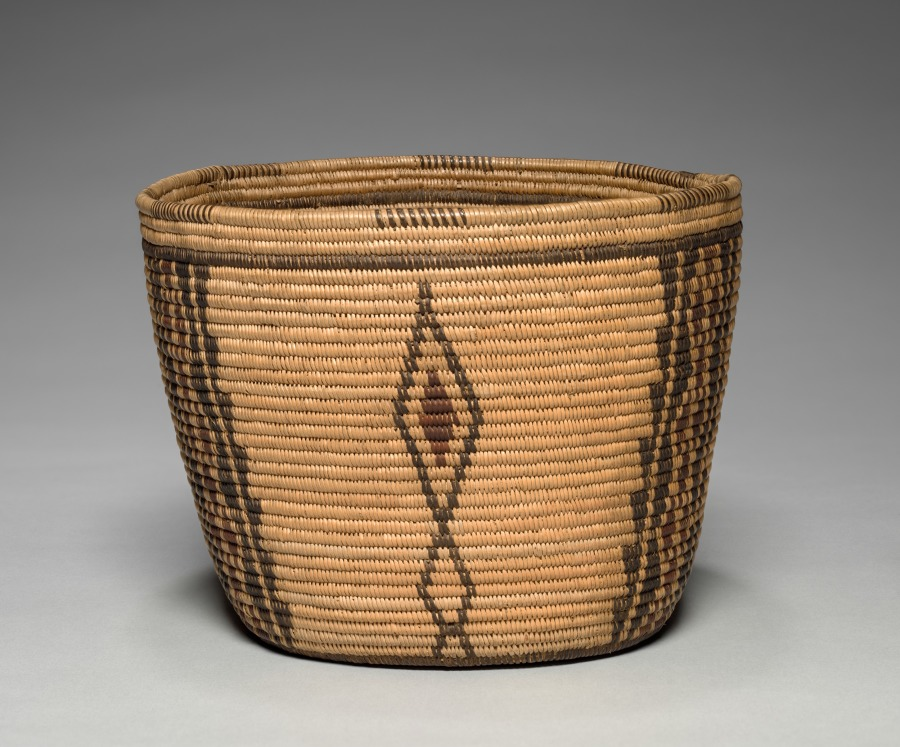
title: Bowl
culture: Great Basin, Timbisha Shoshone (Panamint)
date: c 1900–1910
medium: willow, devil's claw, yucca root; coiled (3 rods)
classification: Basketry